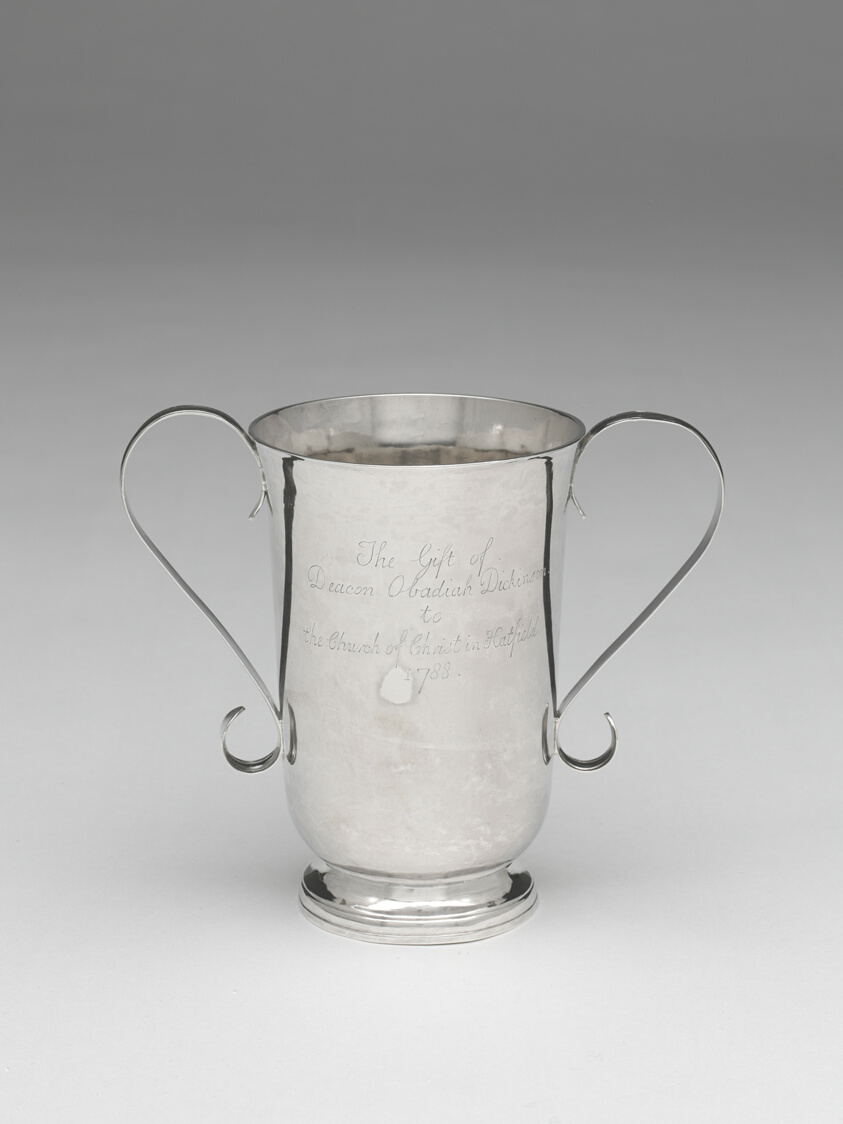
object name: Metalwork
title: Cup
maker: Benjamin Pierpont; American, 1730–1797; Boston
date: 1788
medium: Silver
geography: Boston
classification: drinking vessel; silver; american decorative arts; american arts; decorative arts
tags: dining, drinking